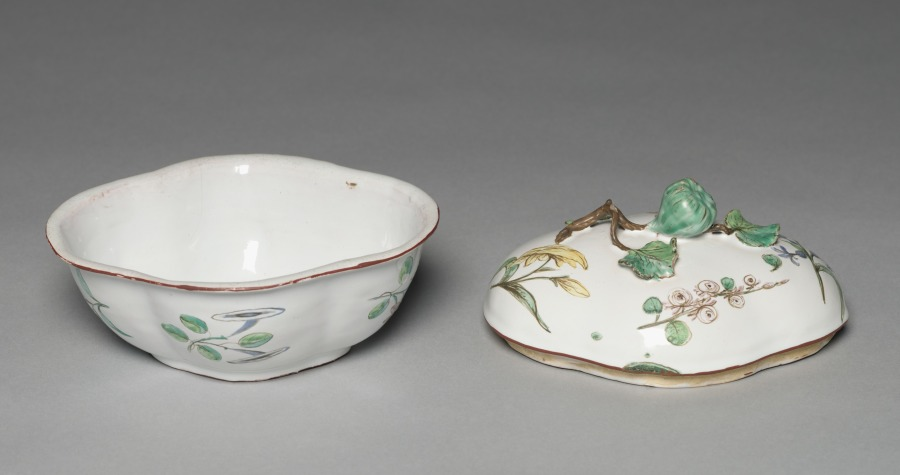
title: Sugar Basin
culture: France, 18th century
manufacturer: Sceaux Factory (French, active 1748–66)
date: c. 1750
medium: faience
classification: Ceramic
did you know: In medieval Italian churches, painted altarpieces served as a focal point for worshippers during the rituals of faith. The figures of Jesus, Mary, and eight saints are framed by a golden background that would have glistened in the flickering candlelight of the church.